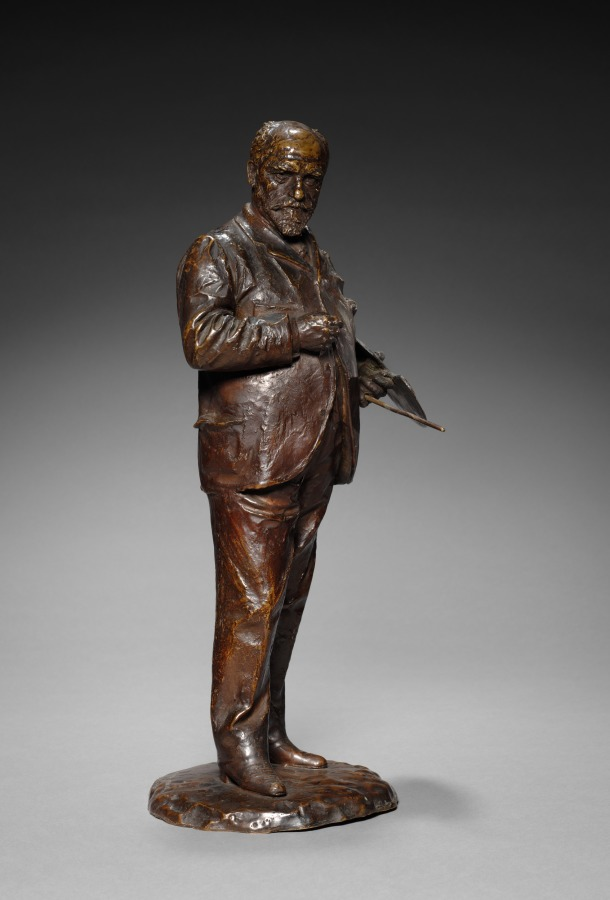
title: Standing Figure of Léon Bonnat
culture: France, 20th century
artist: Denys Pierre Puech (French, 1854–1942)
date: 1903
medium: bronze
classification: Sculpture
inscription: Signed and dated: "1903"; inscribed: "au maitre L. Bonnat"